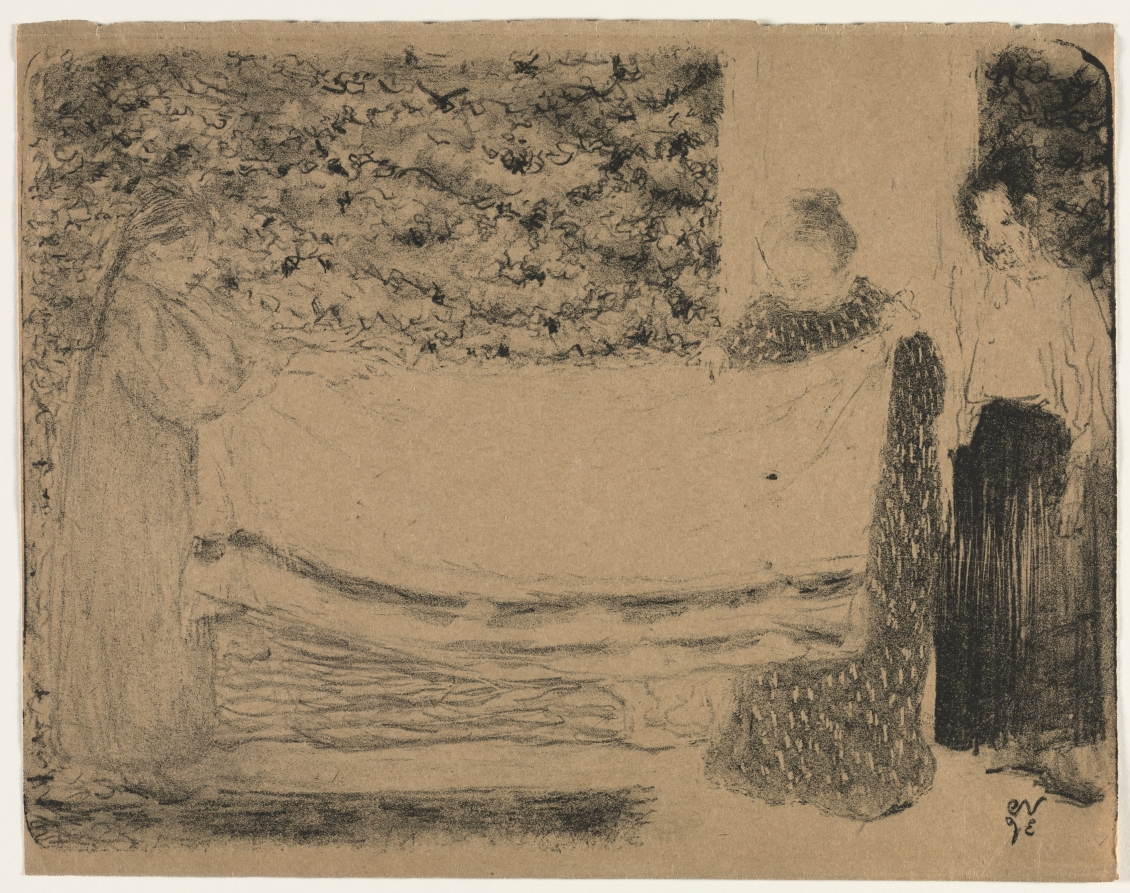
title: Folding the Linen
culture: France, 19th century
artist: Édouard Vuillard (French, 1868–1940)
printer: Edward Ancourt (French, 1841–1898?)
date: 1893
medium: lithograph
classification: Print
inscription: Signed with artist's monogram in the stone, lower right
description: Much of Vuillard’s work was focused on the depiction of contemporary domestic Parisian life. His mother, widowed when the artist was a young boy, worked as a textile designer and dressmaker to support her family, and Vuillard, who lived with her until her death in 1928, was deeply influenced by his experiences of family life. He frequently used his mother and sister as models, depicting them in the midst of household tasks, such as folding laundry.